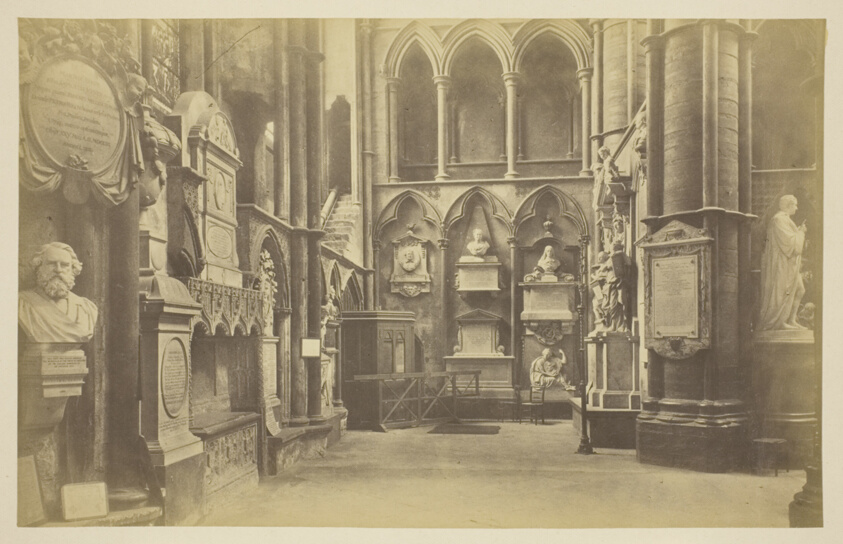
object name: Photograph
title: Westminster Abbey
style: 19th century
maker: Artist unknown; probably English, 19th century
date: 1850–1900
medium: Albumen print, from the album "Views of London"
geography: England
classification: albumen silver print; photographic process; photography; photograph